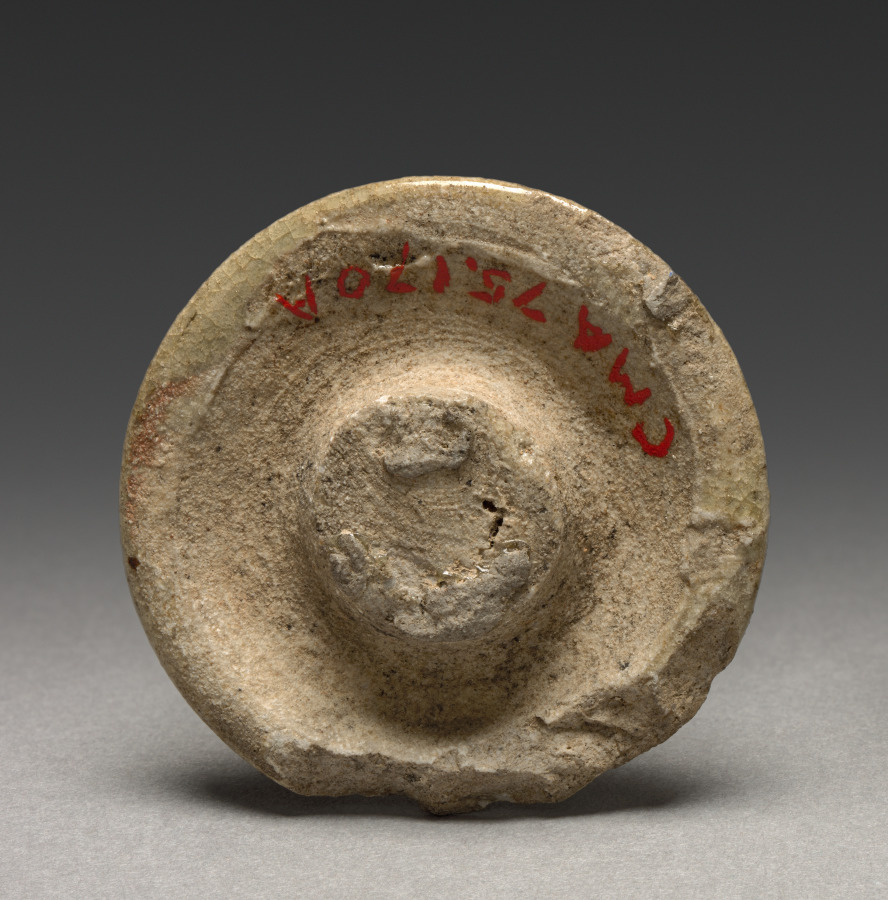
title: Incense Box (lid): Seto Ware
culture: Japan, Kamakura period (1185–1333)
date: 1200s–1300s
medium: glazed stoneware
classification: Ceramic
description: Old Seto, also called Koseto ware, was typically coated with an ash glaze in the mineral feldspar, which produced a yellow or grayish-green glaze. This palette appealed to medieval Buddhist priests and samurai alike. The practice of burning incense in religious, court, and domestic settings dates from the early 700s in Japan.